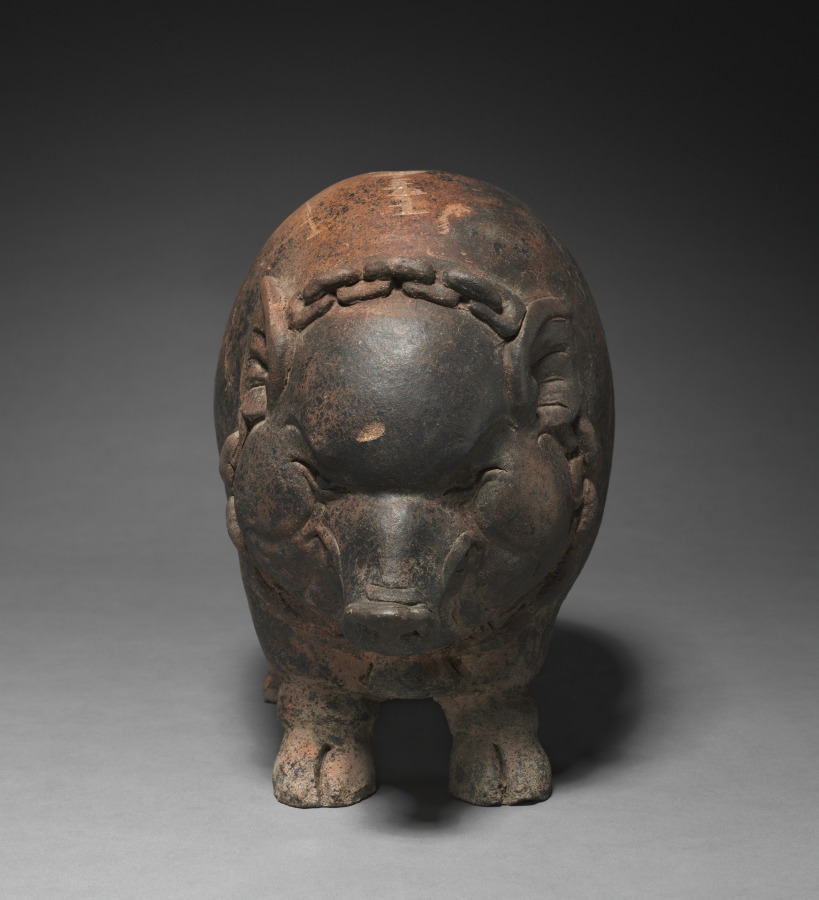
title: Piggy Bank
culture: Java, Majapahit Dynasty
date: 1300s–1400s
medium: terracotta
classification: Sculpture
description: Do I look familiar to you? My round and exaggerated form makes me perfect for storing precious coins, which could be inserted through the slot (now closed) on the hump of my back. My fierce expression is a warning to scare off any burglars, and the padlock and chain around my neck indicate my function as a personal bank. Yes, I am a piggy bank—a lucky one that has survived intact for over 500 years! Usually we end up broken by people who want our coins.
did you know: The word for piggy bank in Eastern Java is tjèlèngan, meaning ‘wild boar.’